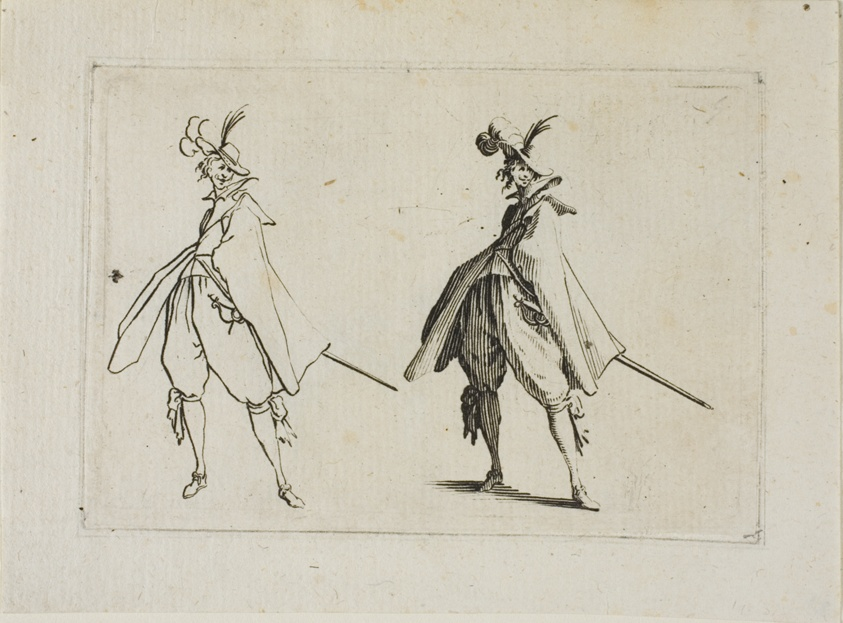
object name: Print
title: The Gentleman with a Large Coat, Seen from the Front, from The Caprices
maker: Jacques Callot (French, 1592-1635)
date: c. 1622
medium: Etching on ivory laid paper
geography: France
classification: etching; print; prints and drawing